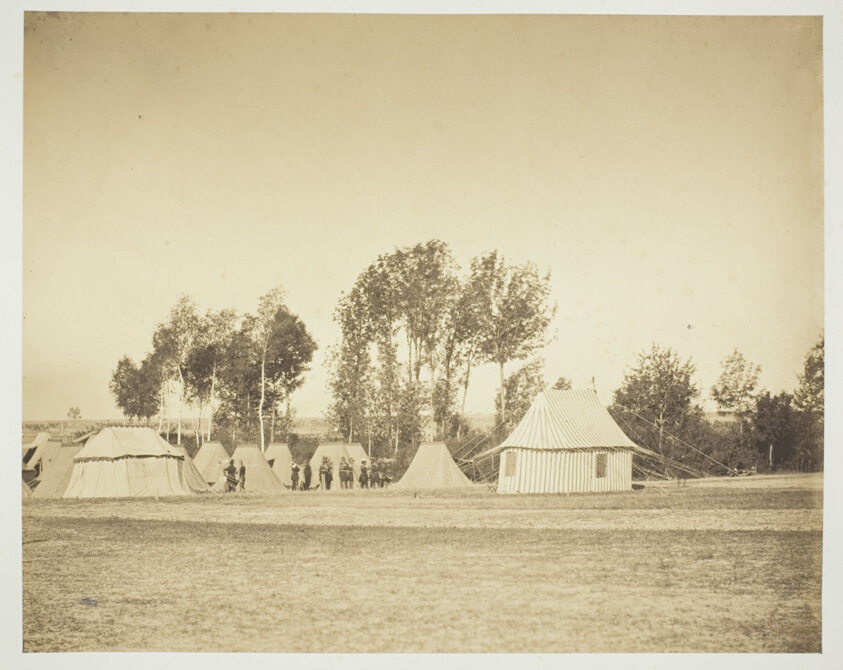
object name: Photograph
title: Untitled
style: 19th century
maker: Gustave Le Gray (French, 1820–1884)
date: 1857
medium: Albumen print, from the album "Souvenirs du Camp de Châlons"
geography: France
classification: albumen silver print; photographic process; photography; photograph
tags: Paris